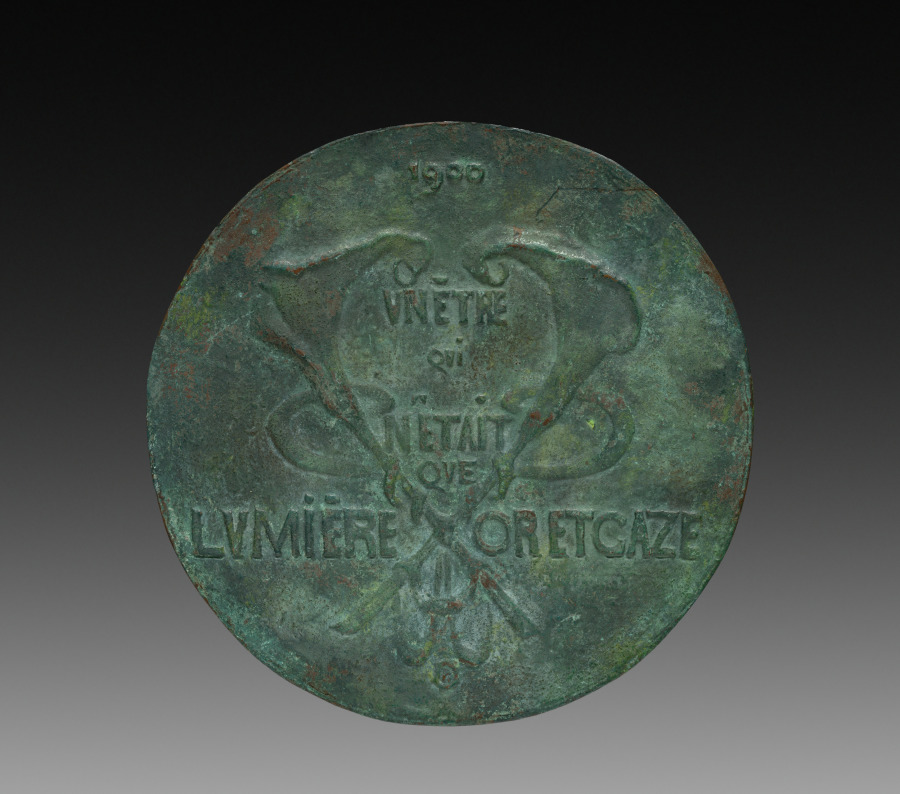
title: Medal: Loïe Fuller (obverse)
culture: France, 20th century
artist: Pierre Roche (French, 1855–1922)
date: 1900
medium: bronze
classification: Metalwork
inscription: "-Fuller-/Loïe."